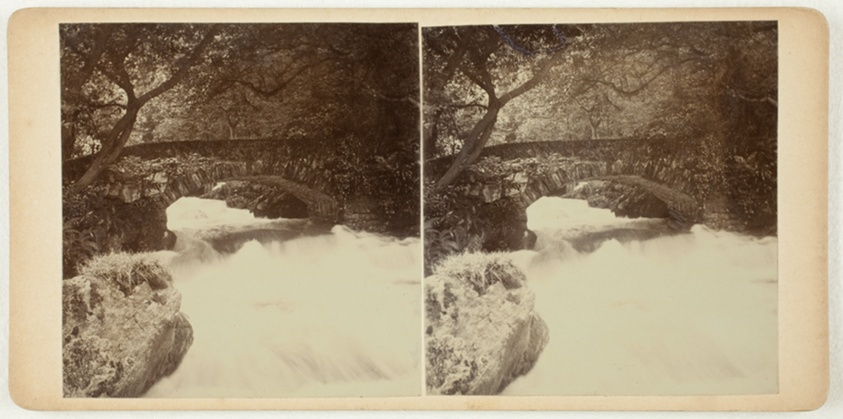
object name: Photograph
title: Untitled (Glen Lyn)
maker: Artist unknown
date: October 1903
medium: Albumen print, stereo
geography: Virginia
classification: photograph; albumen silver print; photography